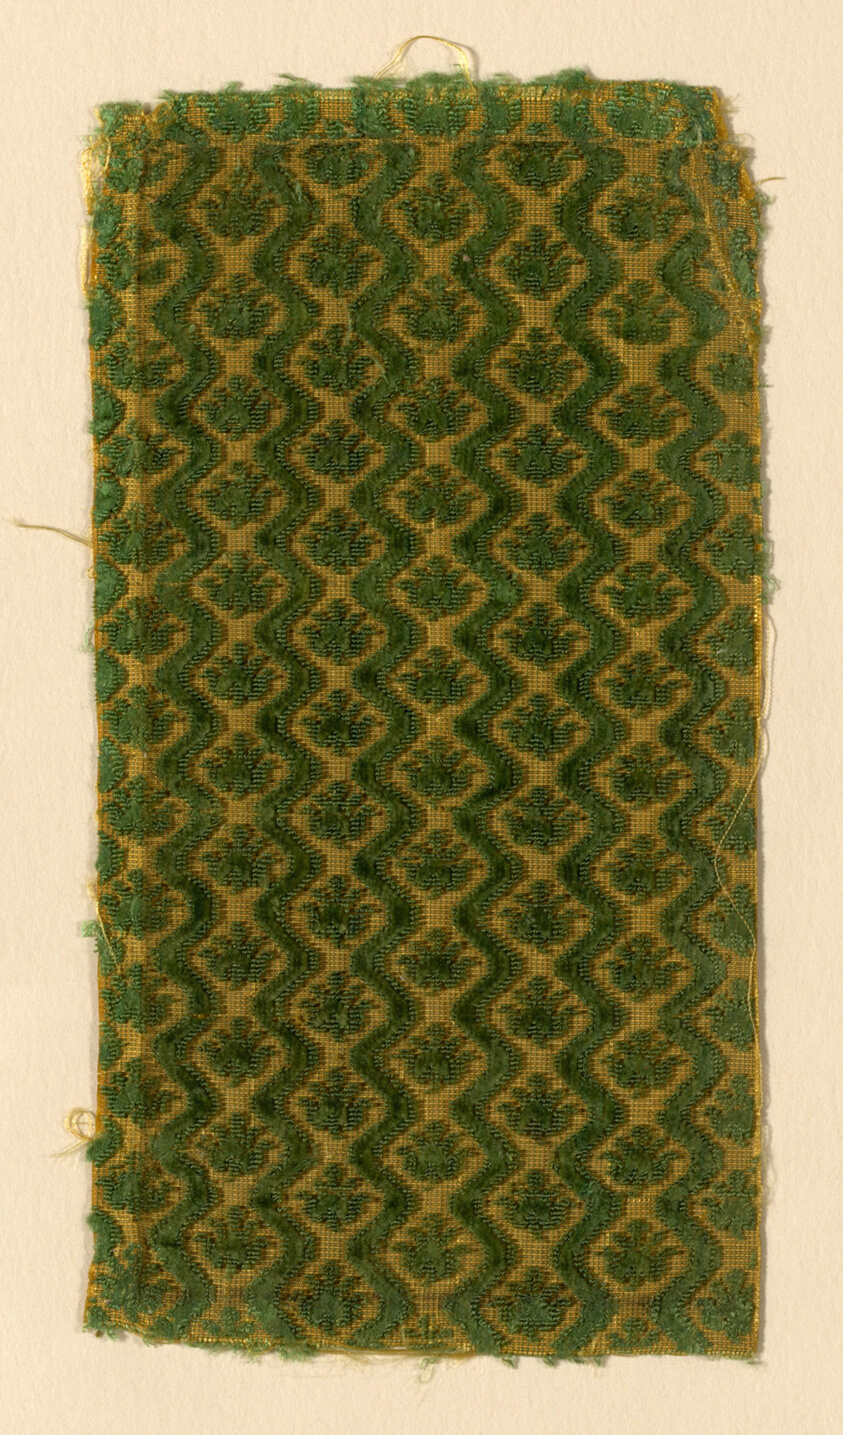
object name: Textile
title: Fragment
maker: Italy, Florence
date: 16th century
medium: cisele voided cloth velvet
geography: Italy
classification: textile; weaving - velvet; weaving